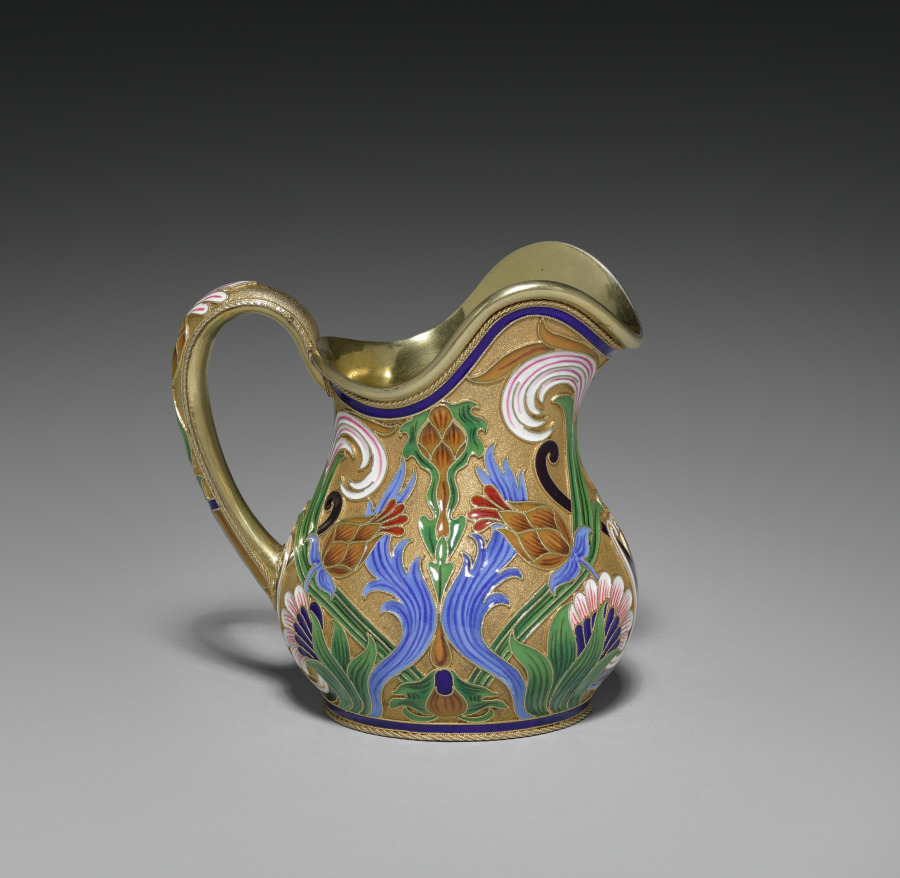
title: Creamer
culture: Russia, St. Petersburg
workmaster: attributed to Feodor Ivanovich Rückert (Russian, 1840–1917)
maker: House of Fabergé (Russian, 1842–1918)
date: 1887–96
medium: silver gilt, opaque cloisonné enamel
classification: Miscellaneous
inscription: 88, St. George [assay mark for Moscow, 1882-1896]; C. Fabergé (in Cyrillic); double-headed eagle [imperial warrant]; 10593 scratched.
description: Fabergé’s craftsmen in Moscow, especially under the watchful eye of workmaster Feodor Rückert, became known for their work in the Pan-Slavic or Neo-Russian style, hearkening back to 17th-century motifs of Russian folk art. Often on rather conventional shapes, Rückert and his silversmiths created an explosion of color, achieved through the historic technique of cloisonné enamel in which tiny metal lines are soldered to the surface then filled with glass powders in various colors and fired to create a high gloss finish. The result is a spectacular evocation of the 17th-century originals. Far from mere copies, however, Rückert's designs, such as this tea service, employ naturalistic or abstract motifs in a thoroughly modern adaptation of a remarkable earlier period of Russian art and decoration.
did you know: This creamer is part of a larger tea service.